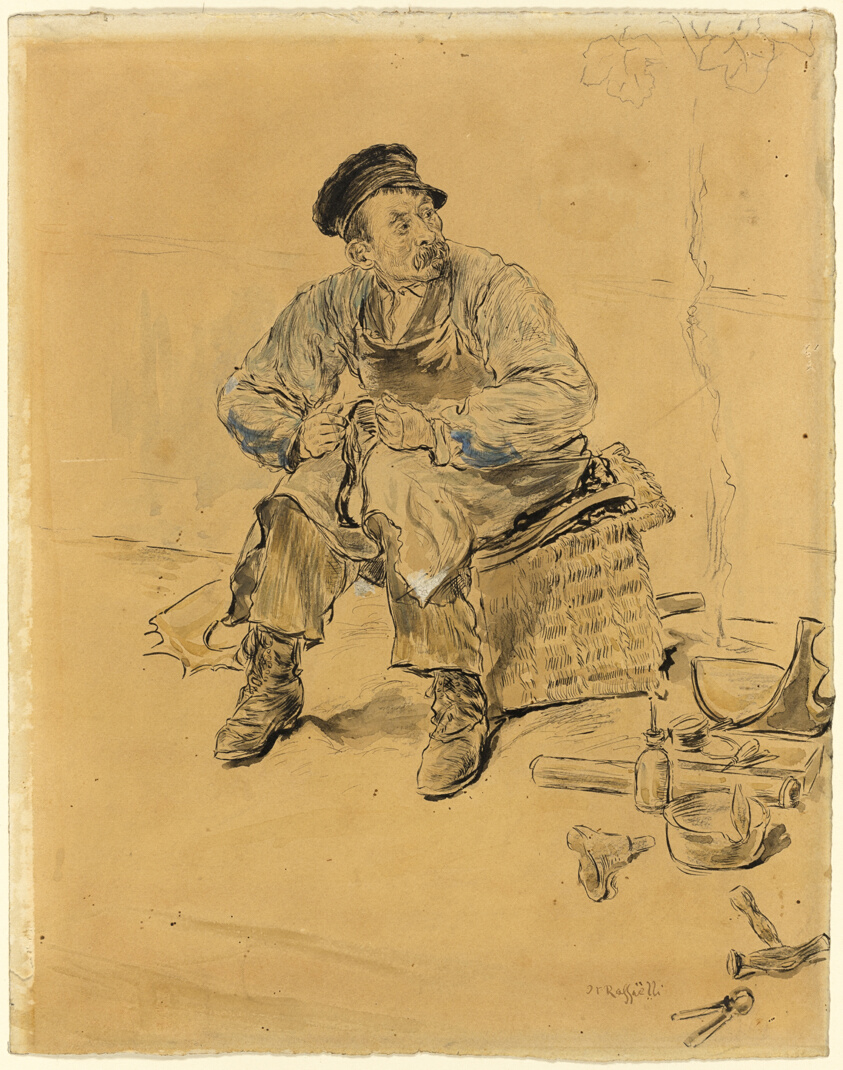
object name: Drawing and Watercolor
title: A Cobbler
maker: Jean François Raffaëlli; French, 1850-1924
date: c. 1889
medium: Pen and black ink, with watercolor, touches of white oil paint, and traces of charcoal on ivory wove paper (discolored to tan)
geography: France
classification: pen and ink drawings; drawings (visual works); prints and drawing